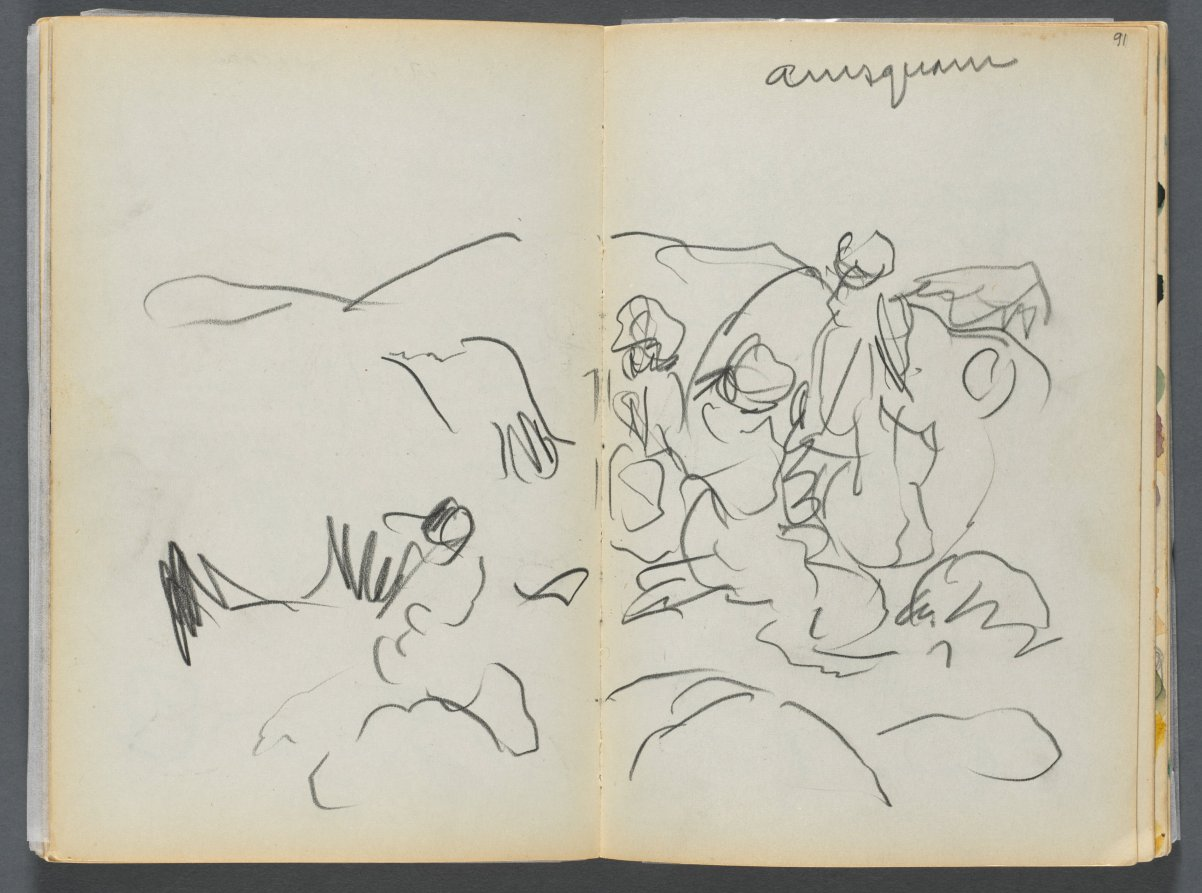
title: Sketchbook- The Granite Shore Hotel, Rockport, page 090 & 91: "Annisquam"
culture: America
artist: Maurice Prendergast (American, born Newfoundland [now Canada], 1858–1924)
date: 1905–10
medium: graphite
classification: Bound Volume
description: This sketchbook contains 72 pages of pencil drawings and 9 watercolors of Cape Ann. On the inside of the cover Prendergast wrote the address of the Granite Shore Hotel in Rockport, Massachusetts.